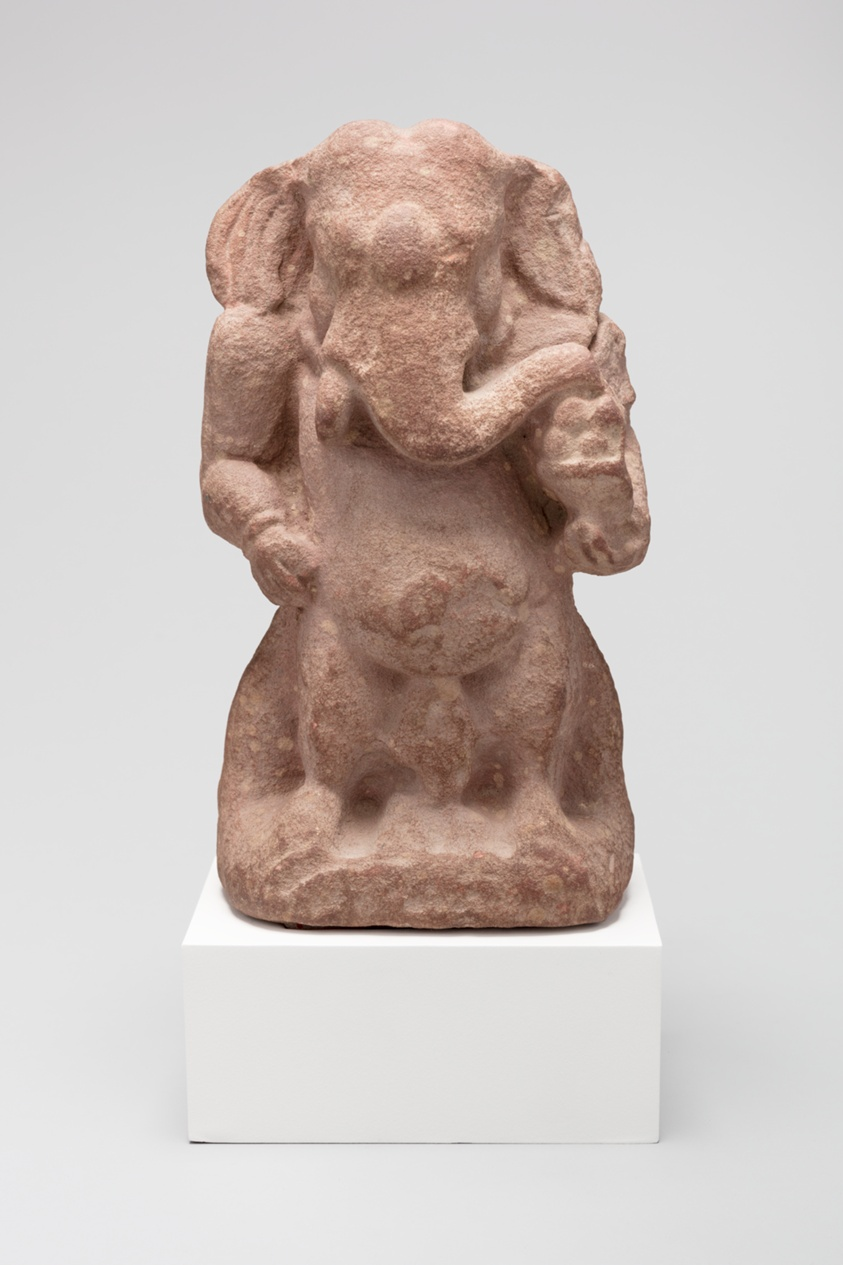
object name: Sculpture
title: Two-Armed God Ganesha Holding a Bowl of Sweets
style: South Asian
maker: India; Uttar Pradesh, Mathura region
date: c. 3rd/4th century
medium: Sandstone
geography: Mathura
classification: sandstone; stone; sculpture; asian art